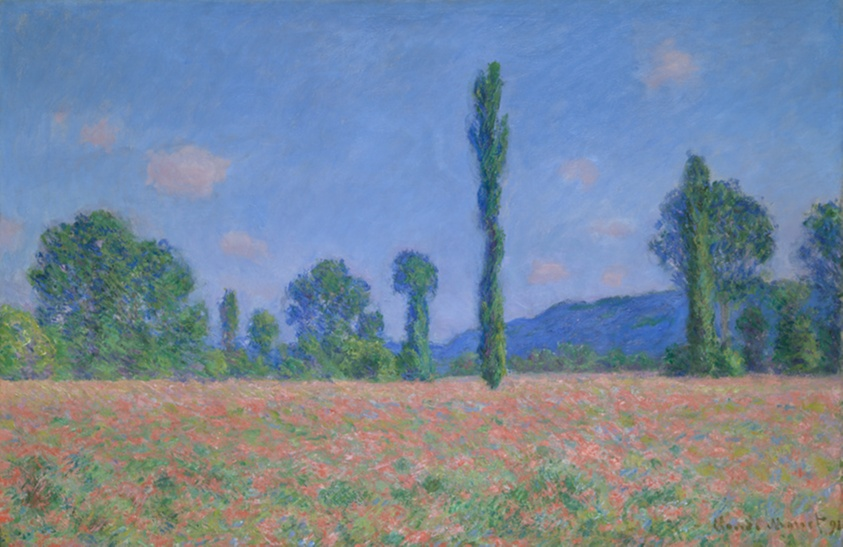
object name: Painting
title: Poppy Field (Giverny)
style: Impressionism, nineteenth century, 19th century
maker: Claude Monet (French, 1840–1926)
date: 1890–91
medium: Oil on canvas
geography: France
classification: oil on canvas; paint; oil paintings (visual works); french; painting; european painting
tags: landscapes, trees, sky, red (color), Poppies, mountains, mountain, green (color), flowers, blue (color), France, weather/seasons